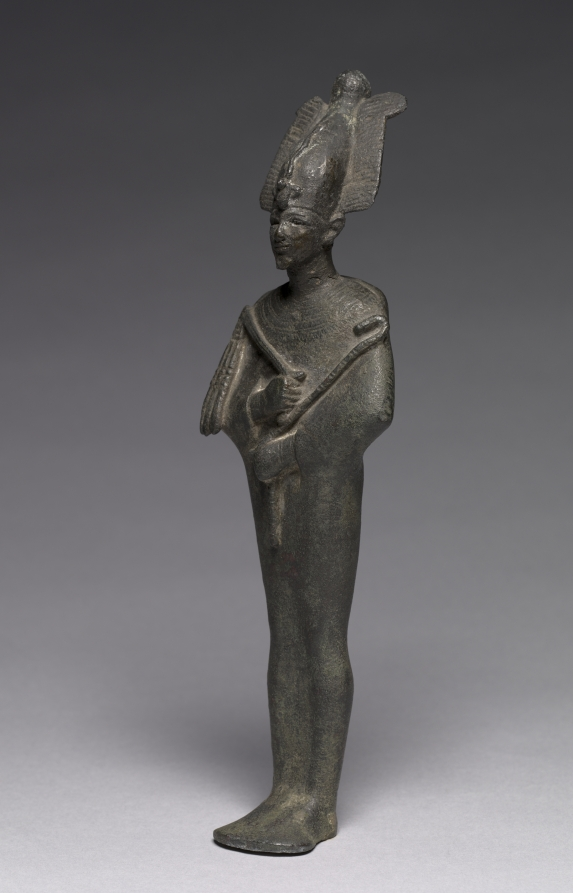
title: Statuette of Osiris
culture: Egypt, Late period (715–332 BCE), Dynasty 26 or later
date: 664–30 BCE OR 664–330 BCE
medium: bronze, body solid cast, head hollow cast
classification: Sculpture